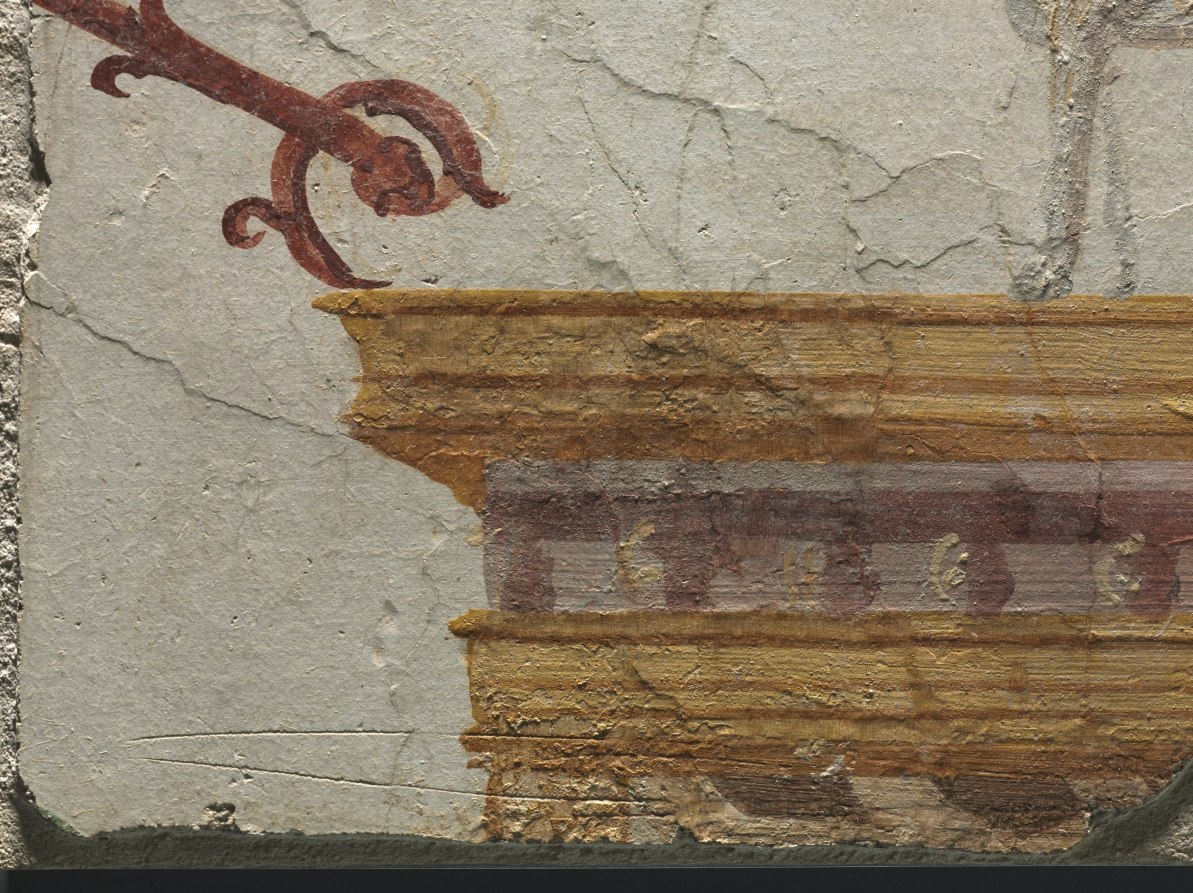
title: Griffin Atop Entablature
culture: Italy, Pompeii, Roman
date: 1–100 CE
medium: fresco fragment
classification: Painting